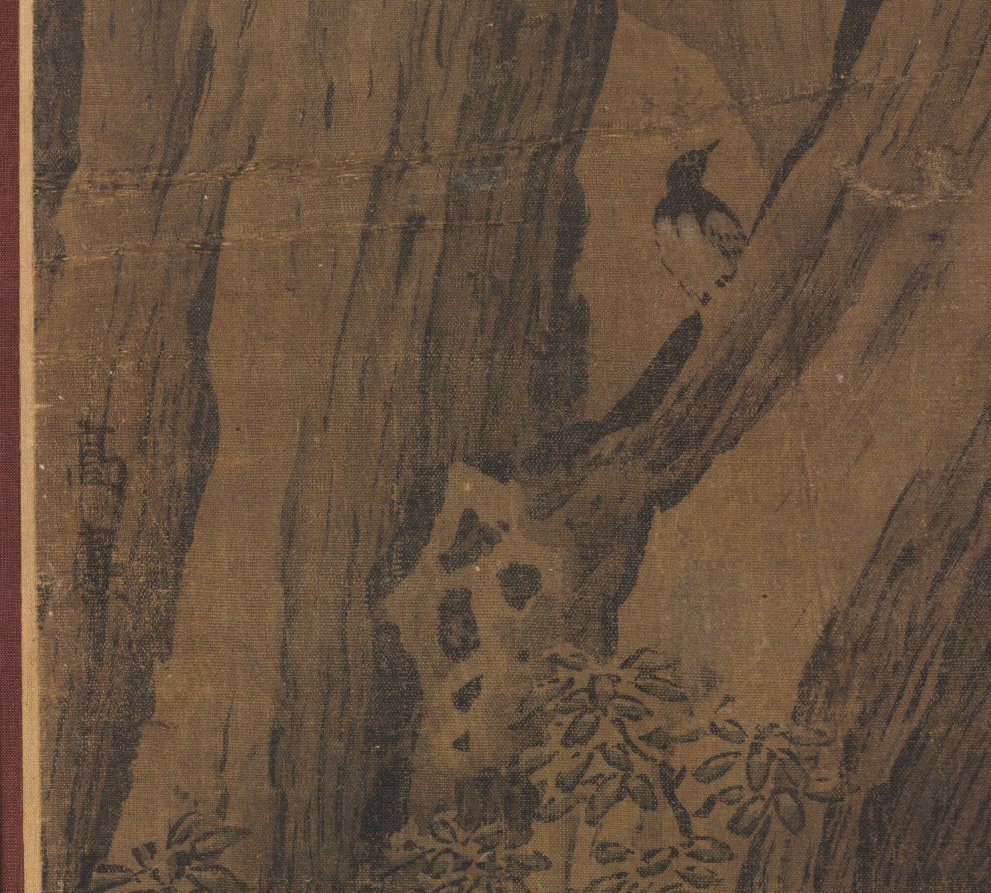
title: Birds in a Grove in a Mountainous Winter Landscape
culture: China, Jin dynasty (1115-1234)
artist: possibly by Gao Tao (Chinese, 1100s)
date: 1100s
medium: hanging scroll; ink and slight color on silk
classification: Painting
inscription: A signature and a seal at lower left edge: Gao Tao 高燾; seal undecipherable. 10 additional seals: 1 of Zhu Gang 朱棡 [1358–1398]; 3 of Suo’etu 索額圖 [1636–1703]; 2 of A’erxipu 阿爾喜普 [1700s]; 1 of Weng Fanggang 翁方綱 [1733–1818]; 3 unidentified.